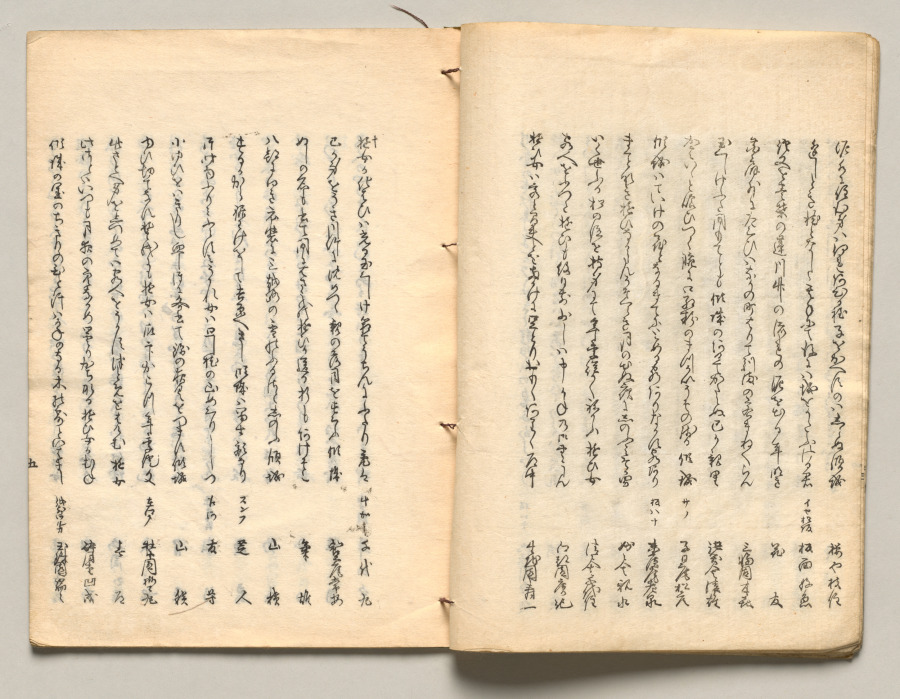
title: Spread Thirteen from Volume Four of People of Japan in Light Verse (Kyōka)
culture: Japan, Edo period (1615–1868)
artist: Utagawa Hiroshige (Japanese, 1797–1858)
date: 1857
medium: Woodblock-printed book; ink and color on paper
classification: Bound Volume